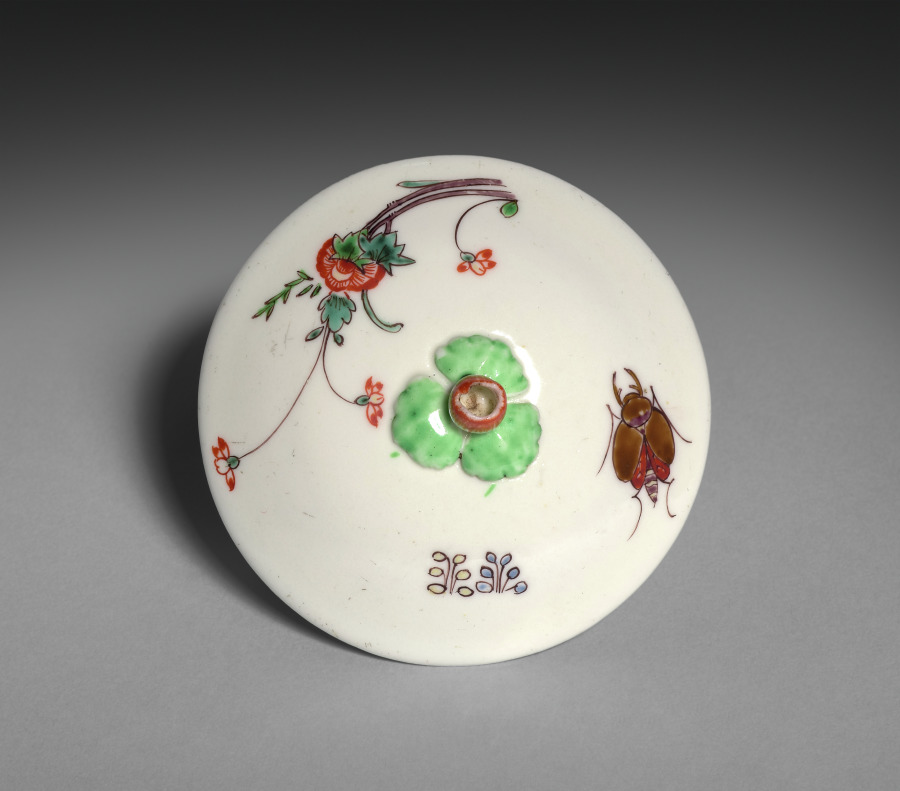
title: Figure of a Chinese with Jar (cover)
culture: France, Chantilly, 18th century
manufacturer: Chantilly Porcelain Factory (French)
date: c. 1735– 1740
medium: soft-paste porcelain with enamel decoration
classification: Ceramic